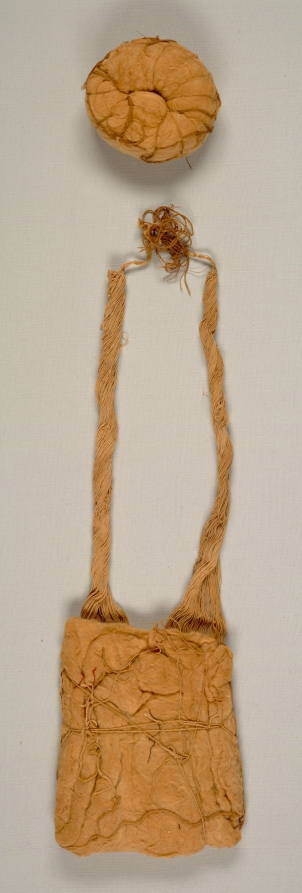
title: Mummy Bundle "Mask"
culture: Peru, South Coast, Ica Valley, Ocucaje site, Paracas style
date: 200–1 BCE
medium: cotton and pigment, plain weave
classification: Textile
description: The Paracas people buried their dead in pear-shaped mummy bundles, created by carefully wrapping the seated human body in layers of garments and other textiles. Sometimes a painted cloth was placed on the outer layer at the top of the bundle, as though it served as the bundle’s face, head, or “mask.” Some cloths were painted with masklike faces, although others—such as this example—feature complete figures, which may be mythological beings with supernatural appendages.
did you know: These masks fall into two categories, those with only a face and those with a full-bodied figure.